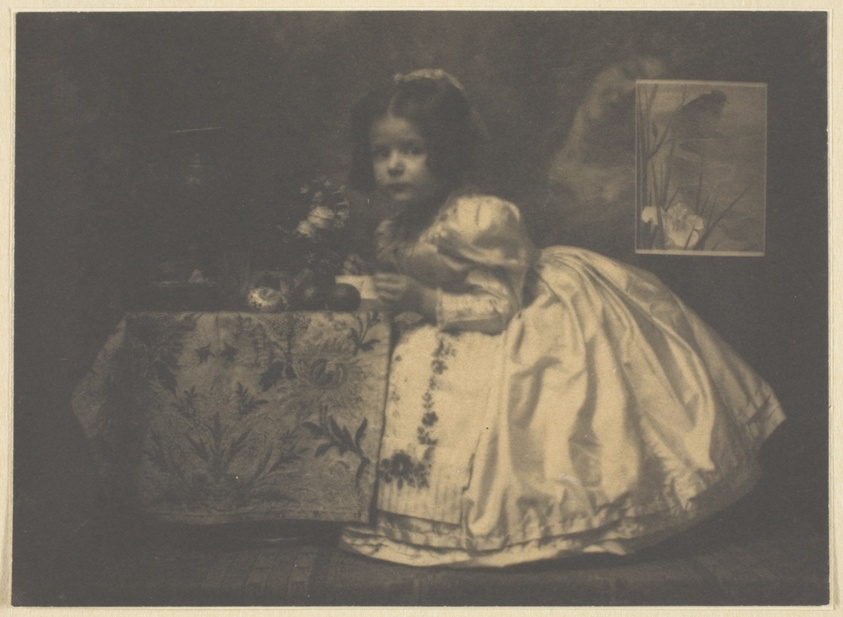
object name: Photograph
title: Brigitta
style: Pictorialism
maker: Frank Eugene (American, 1865–1936)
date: c. 1906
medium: Platinum print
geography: United States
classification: platinum print; photographic process; photography; photograph